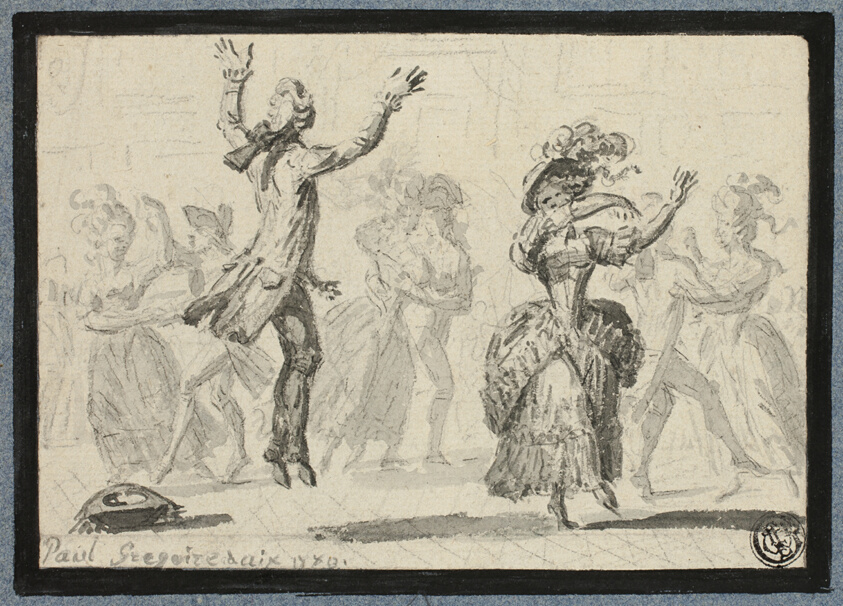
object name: Drawing and Watercolor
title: Ladies and Gentlemen Dancing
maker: Paul Grégoire; French, flourished 1781-1823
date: 1781/1823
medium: Brush and gray wash with black crayon, on ivory laid paper, laid down on card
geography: France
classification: ink or chalk wash; drawings (visual works); prints and drawing